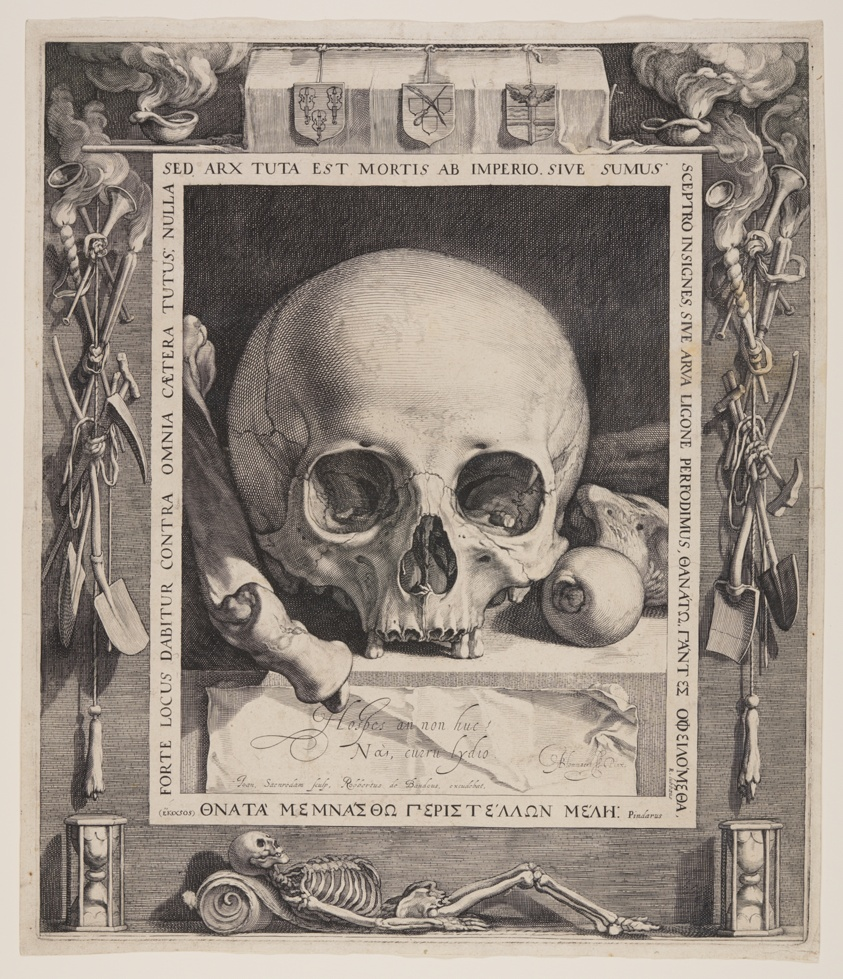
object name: Print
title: Vanitas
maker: Jan Saenredam (Dutch, 1565–1607); after Abraham Bloemaert (Dutch, 1566–1651)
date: c. 1600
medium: Engraving on ivory laid paper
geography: Netherlands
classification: print; paper; prints and drawing; engraving